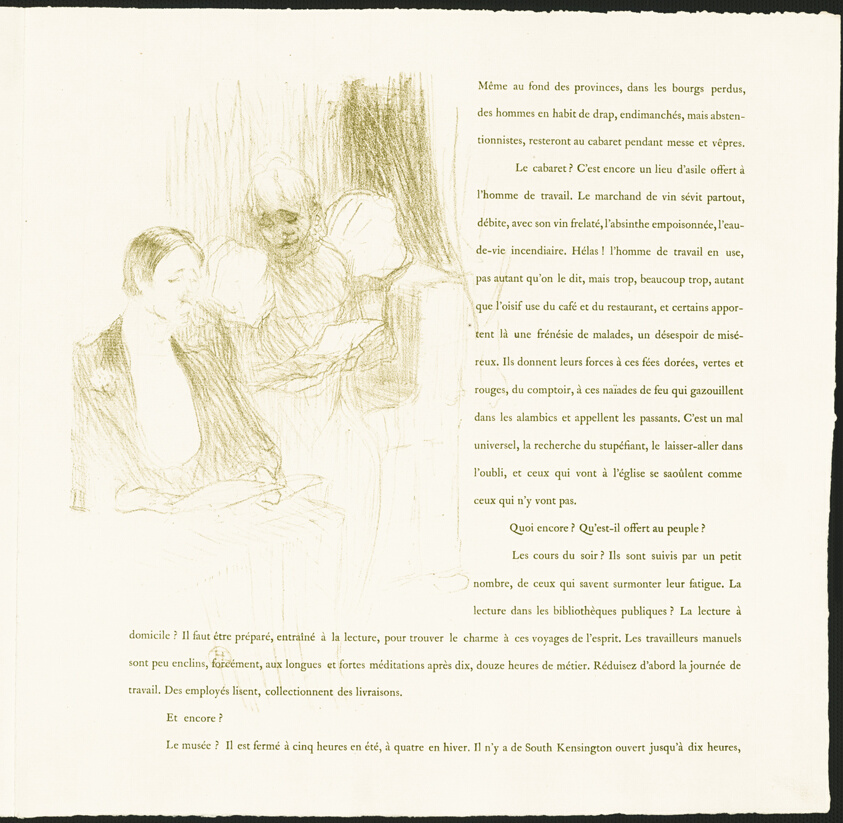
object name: Print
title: Yvette Guilbert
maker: Henri de Toulouse-Lautrec (French, 1864-1901)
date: 1894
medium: Color lithograph, with letterpress, on ivory laid paper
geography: France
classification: lithograph; print; prints and drawing